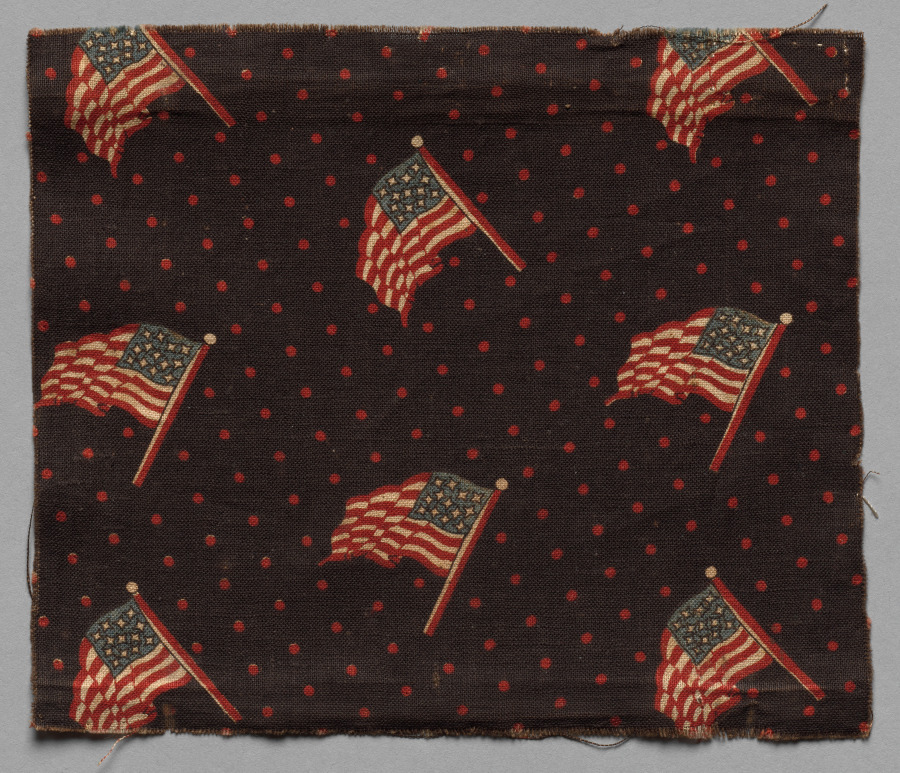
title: Textile Fragment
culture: America, early 19th century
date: early 19th century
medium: printed cotton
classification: Textile